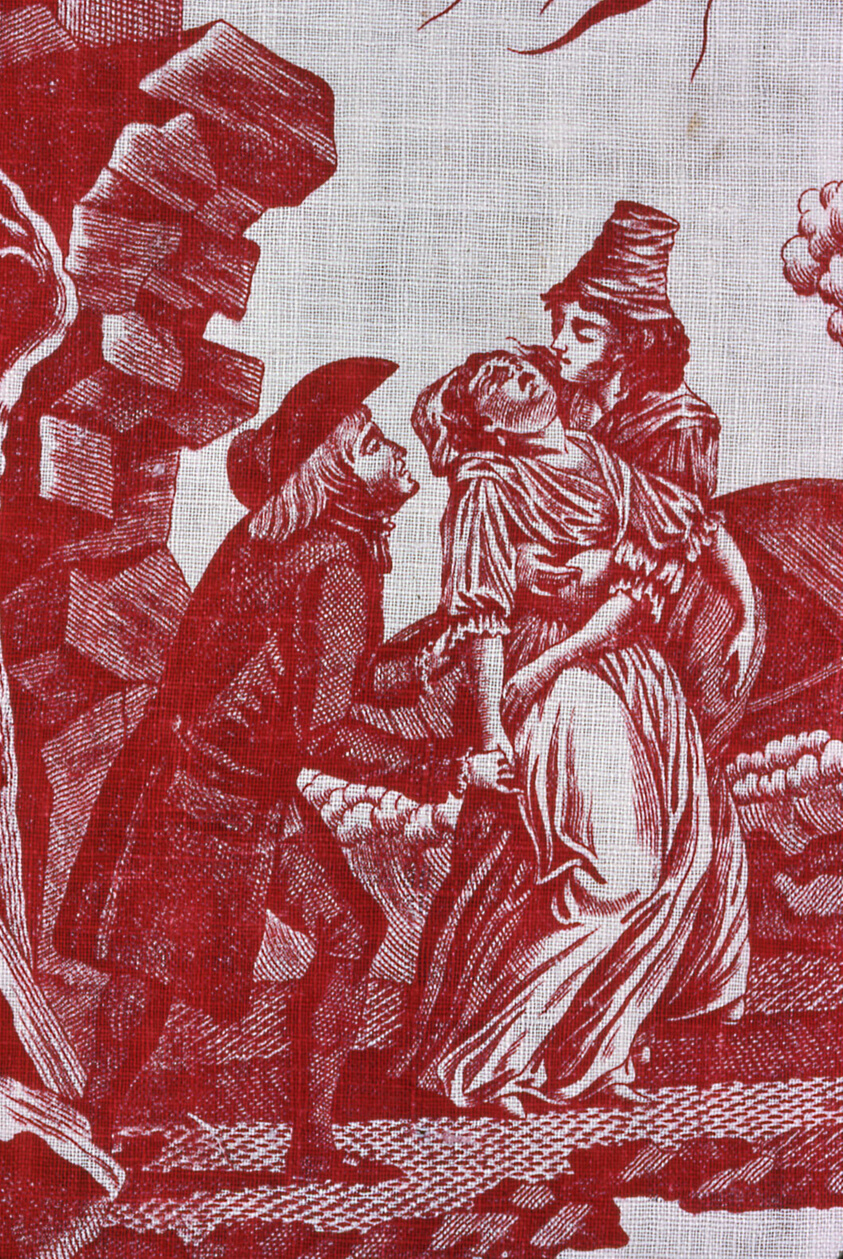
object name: Textile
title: “Paul and Virginie” Furnishing Fabric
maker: Manufactured by Petitpierre et Cie. (French, c. 1790-1802); Based on the story by Bernardin de Saint-Pierre (French, 1737-1814); France, Nantes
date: c. 1795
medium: Cotton, plain weave; copperplate printed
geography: Nantes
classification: weaving - printed; textile; furnishing textile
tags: people, birds, ships, trees, water, waves